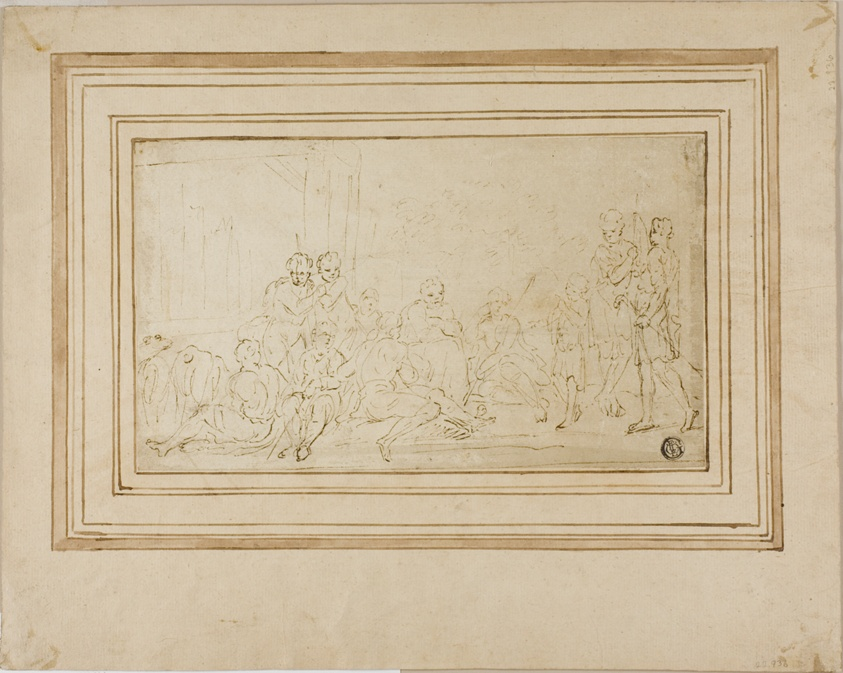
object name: Drawing and Watercolor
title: Joseph Interpreting His Dreams to his Brothers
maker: Style of Giuseppe Diamantini (Italian, 1621-1705)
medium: Pen and brown ink on ivory laid paper, laid down on tan laid paper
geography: Italy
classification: pen and ink drawings; drawings (visual works); prints and drawing